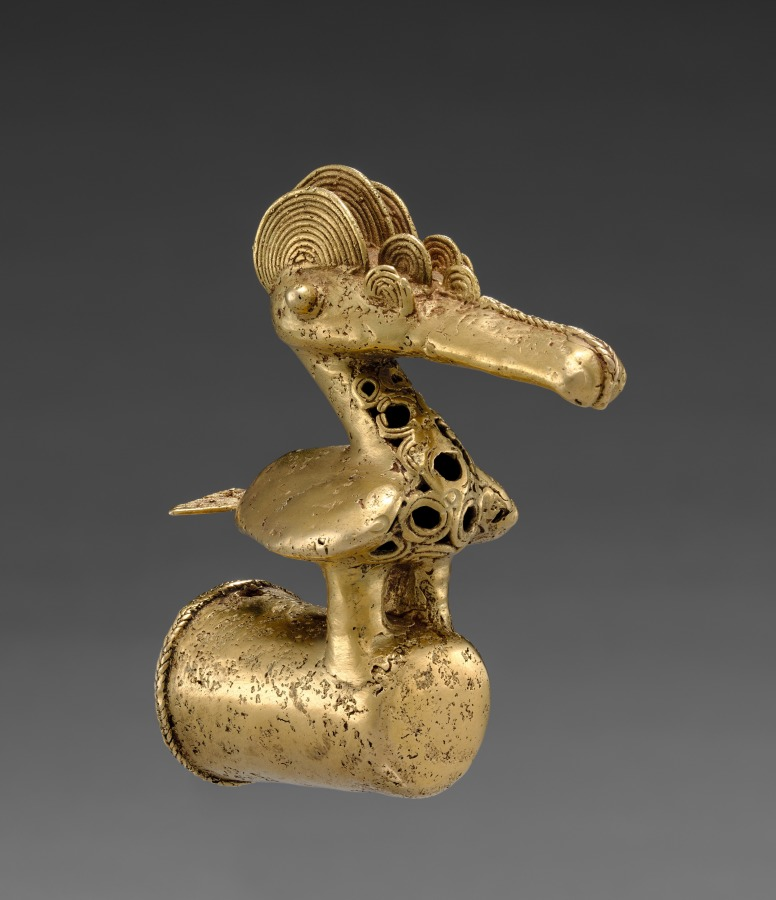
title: Finial with Long-Beaked Bird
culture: Isthmian Region (Colombia), Sinú (Zenú), 5th century-11th century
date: 400–1000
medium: gold, cast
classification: Metalwork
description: Unique to Colombia's Sinú region are gold finials with sculptural images at right angles to thimble-like caps; the caps fit over the end of a staff, an emblem of rank that may have been held horizontally. This impressive finial features a dignified, long-beaked bird whose body contains a pellet that rattles when the finial moves. Sinú animal imagery is understudied but may relate to beliefs about the cosmos. For instance, contemporary natives attribute importance to birds because they have the capacity to move among different environments (air, land, water); they may have been regarded as mediators among levels of the cosmos.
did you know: Birds, particularly water birds, may have been thought to travel between the different layers of the universe.